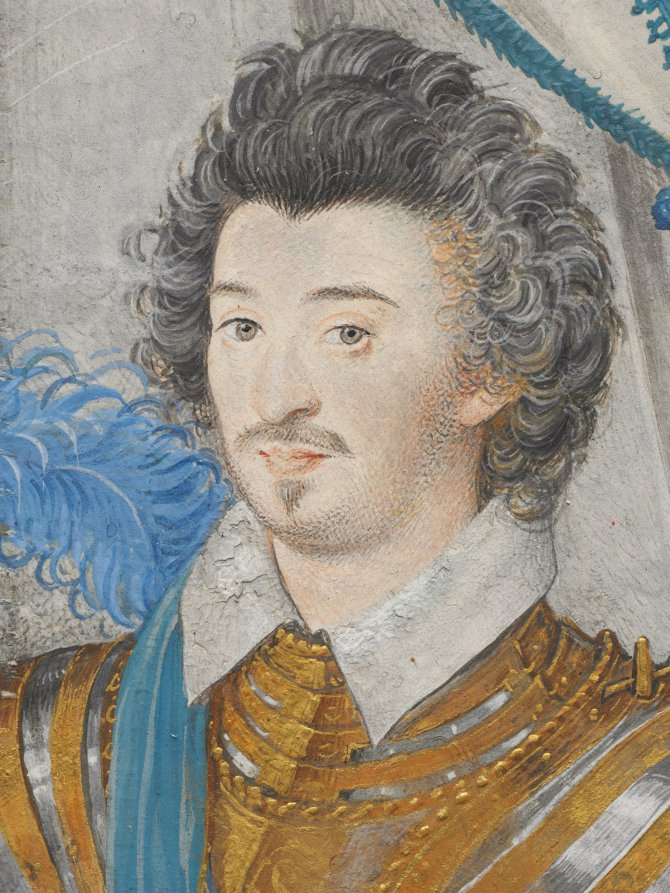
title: Sir Anthony Mildmay, Knight of Apethorpe, Northamptonshire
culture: England, 16th century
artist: Nicholas Hilliard (English, c. 1547–1619)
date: c. 1590–93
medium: Watercolor on vellum, laid on card, mounted on wood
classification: Portrait Miniature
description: Framed by the folds of a circular tent, Sir Anthony Mildmay strikes a relaxed and confident pose, with his right hand resting on a cloth-covered table and his left grasping the hilt of his thin, double-edged sword called a rapier. Helmet, gauntlet, and leg coverings are scattered about, as if Mildmay has been interrupted in the act of putting on or taking off his armor. Despite its small scale, this portrait reveals Nicholas Hilliard’s emulation of (and rivalry with) life-size court portraiture, while his meticulous attention to detail and use of costly materials like shell gold reflect the refined world of courtly tournaments.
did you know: A little dog gazes adoringly at Mildmay who was by all accounts a very arrogant man.